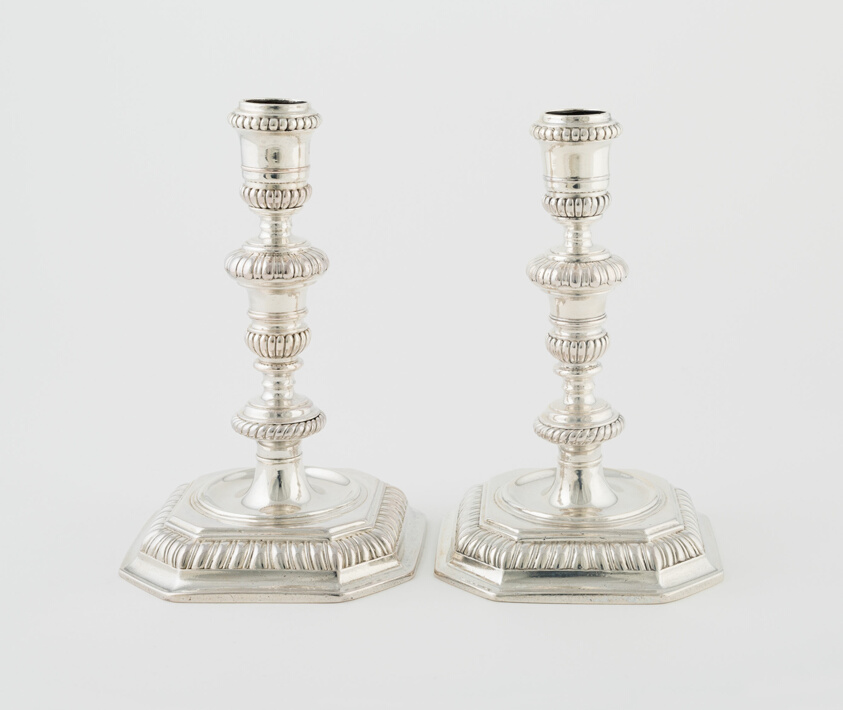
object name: Metalwork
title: Pair of Candlesticks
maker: England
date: 1691/92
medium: Silver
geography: England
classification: candleholder - candlestick; candleholder; silver; metalwork; european decorative arts